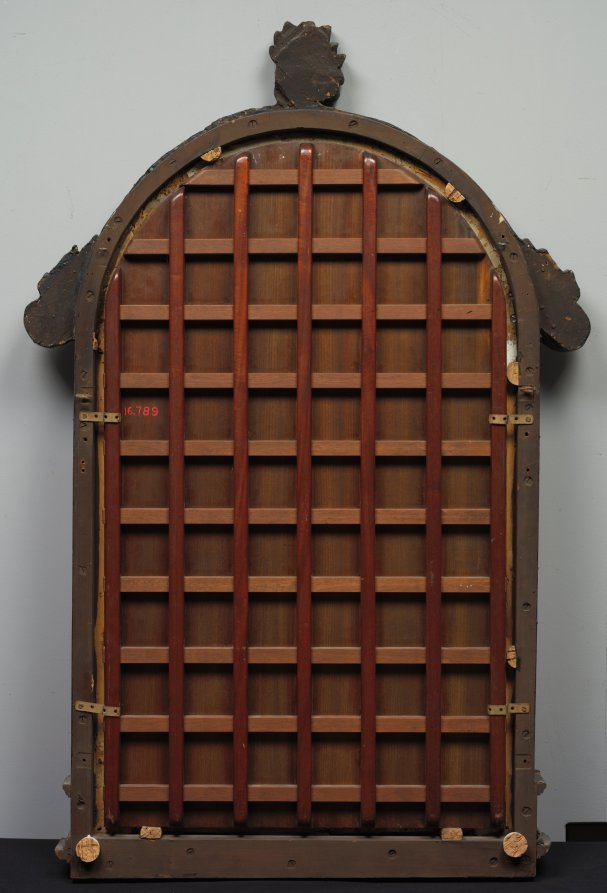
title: Madonna and Child with Tobias and the Angel Raphael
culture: Italy, 15th century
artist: Francesco Botticini (Italian, c. 1446–1497)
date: c. 1470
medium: tempera on poplar panel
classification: Painting